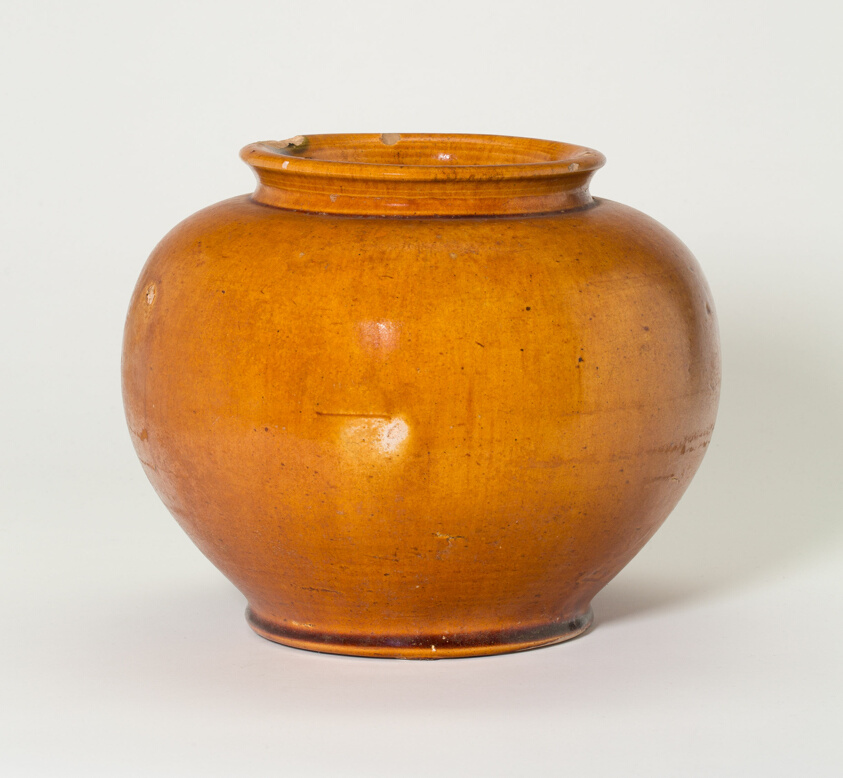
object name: Vessel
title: Globular Jar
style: Chinese (culture or style)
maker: China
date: Tang dynasty (618–906), first half of 8th century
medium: Earthenware with amber glaze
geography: China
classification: earthenware; asian art; ceramics; vessel